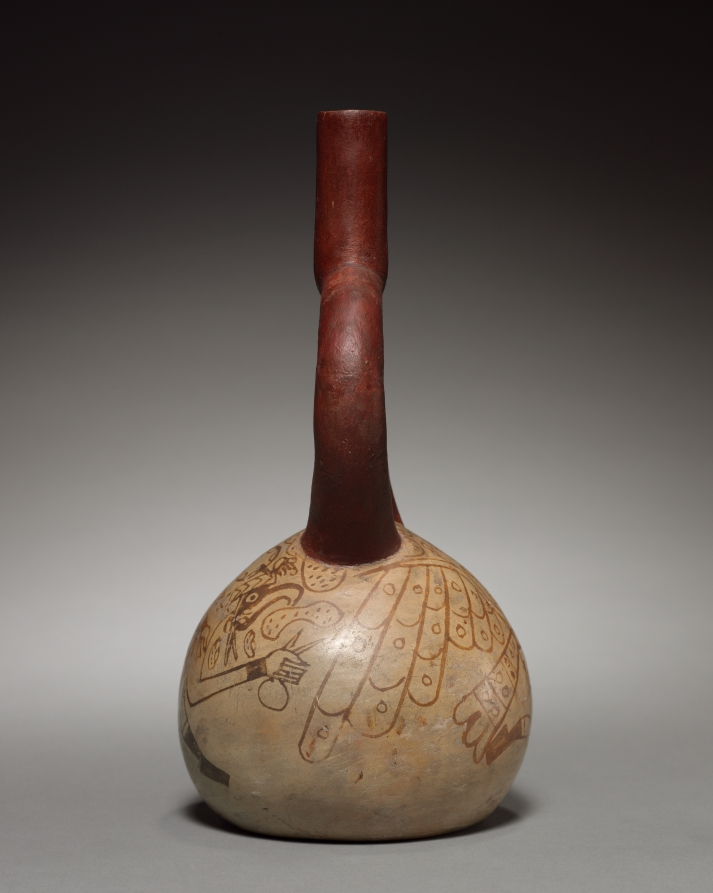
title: Bottle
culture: Peru, Chimú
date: c. 200–400 CE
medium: pottery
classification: Ceramic